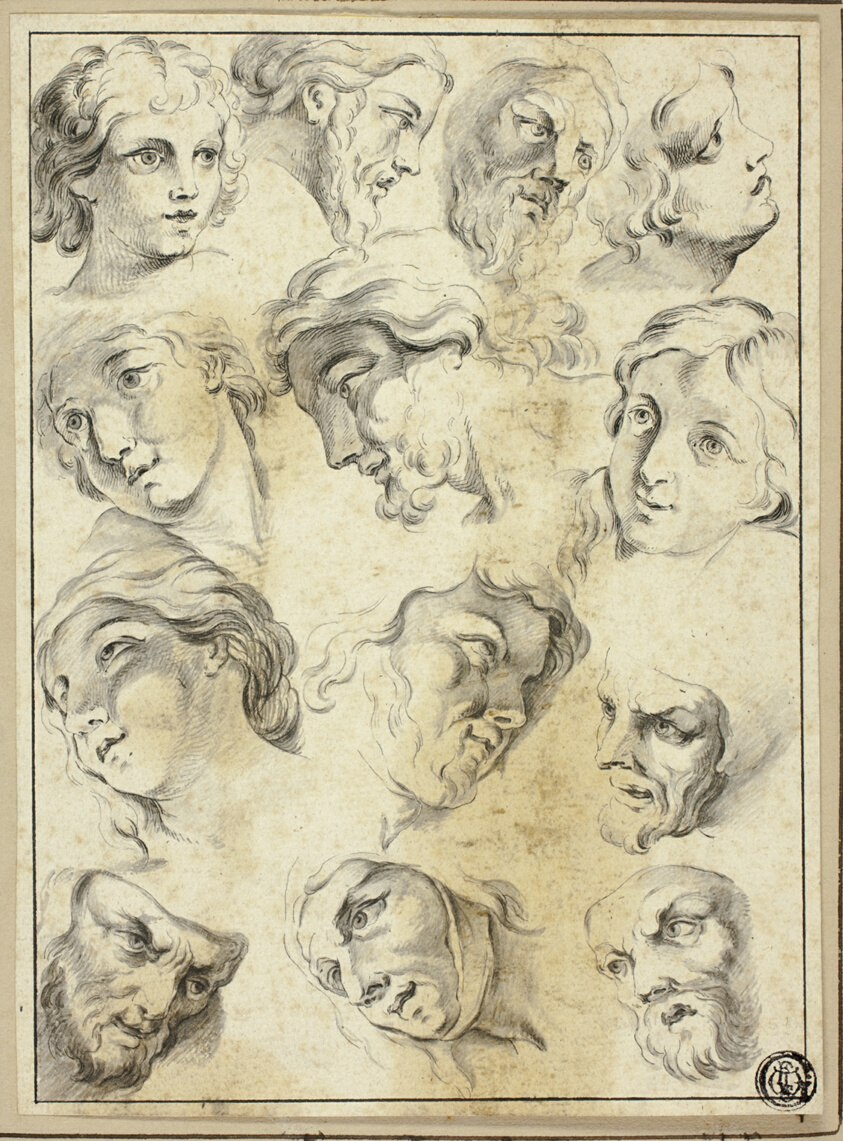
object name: Drawing and Watercolor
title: 13 Sketches of Various Faces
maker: Possibly after Abraham Bloemaert; Dutch, 1566-1651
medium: Pen and black ink, with brush and gray wash, on cream laid paper, tipped onto tan wove paper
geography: Holland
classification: pen and ink drawings; drawings (visual works); prints and drawing